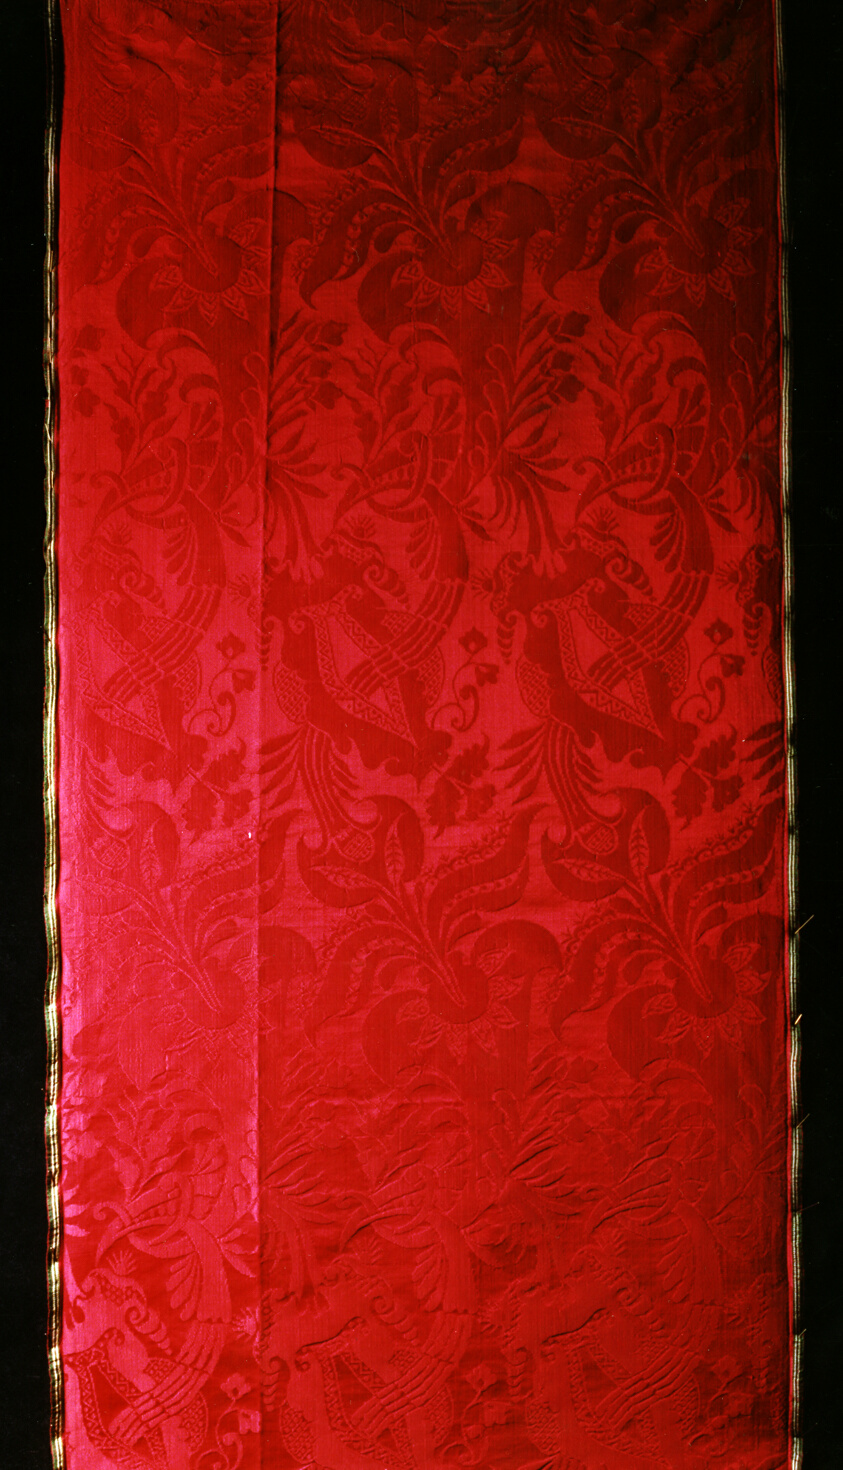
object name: Textile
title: Panel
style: "bizarre" style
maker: France or Spain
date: 1700/25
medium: Silk, satin damask weave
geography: France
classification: textile; weaving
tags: birds, animals, flowers